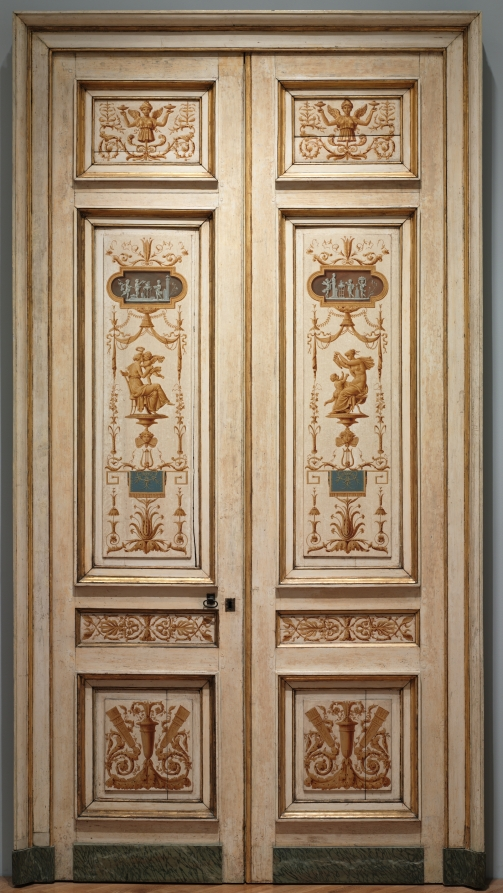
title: Double-Leaf Doors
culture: France, 18th century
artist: Pierre Rousseau (French, 1751–1829)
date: c. 1790s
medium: oil on wood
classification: Painting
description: Shifts in style and taste often result in changes to original architectural details. Rousseau painted these doors with imitation dark wood grain. Another craftsman later scraped off the dark color surrounding the classical designs. This set has recently been conserved.